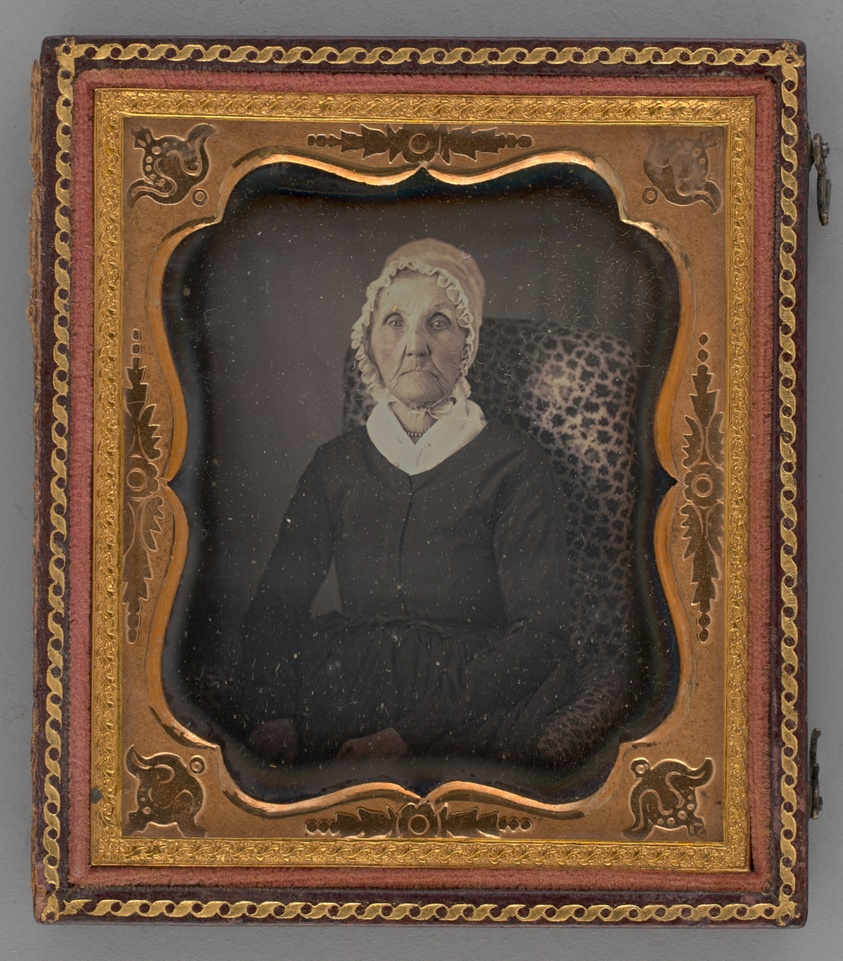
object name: Photograph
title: Untitled (Portrait of a Woman)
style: 19th century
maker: L. H. Hale (American, 1823-1885)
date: 1854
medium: Daguerreotype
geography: United States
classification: portrait; photograph; photographic process; photography; portrait; daguerreotype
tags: lundberg collection, portraits, portraits: female subject